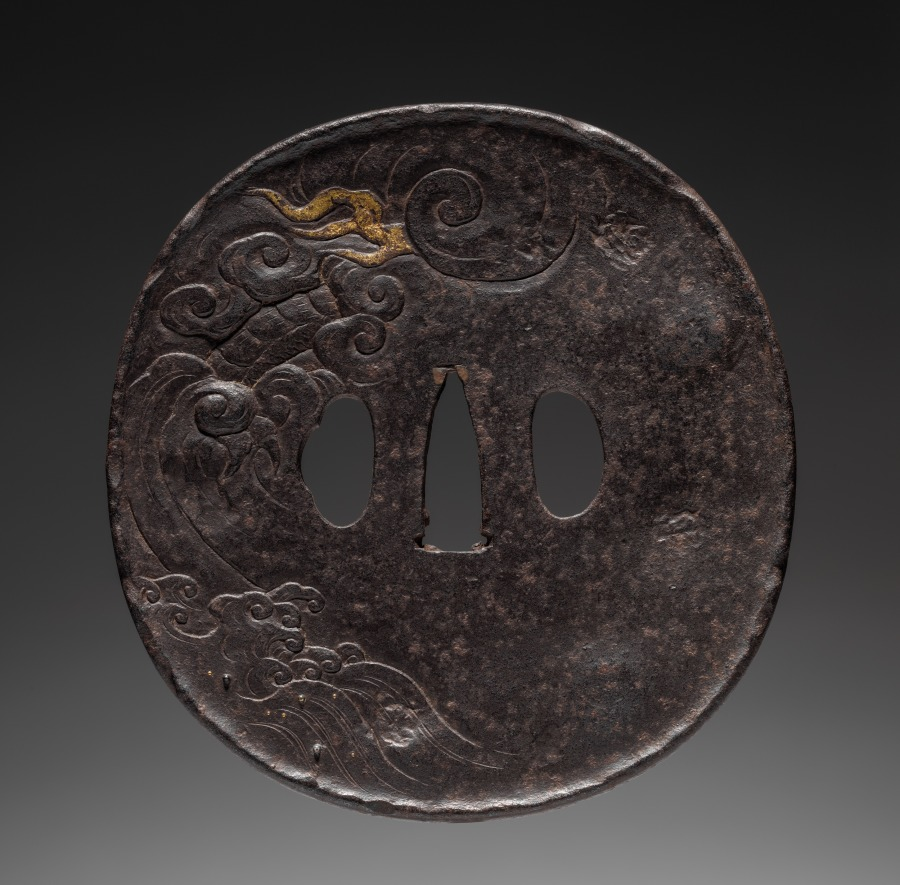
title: Sword Guard (Tsuba) with Dragon in Waves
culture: Japan, possibly Edo period (1615-1868)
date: c. 1615–1868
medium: iron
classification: Arms and Armor